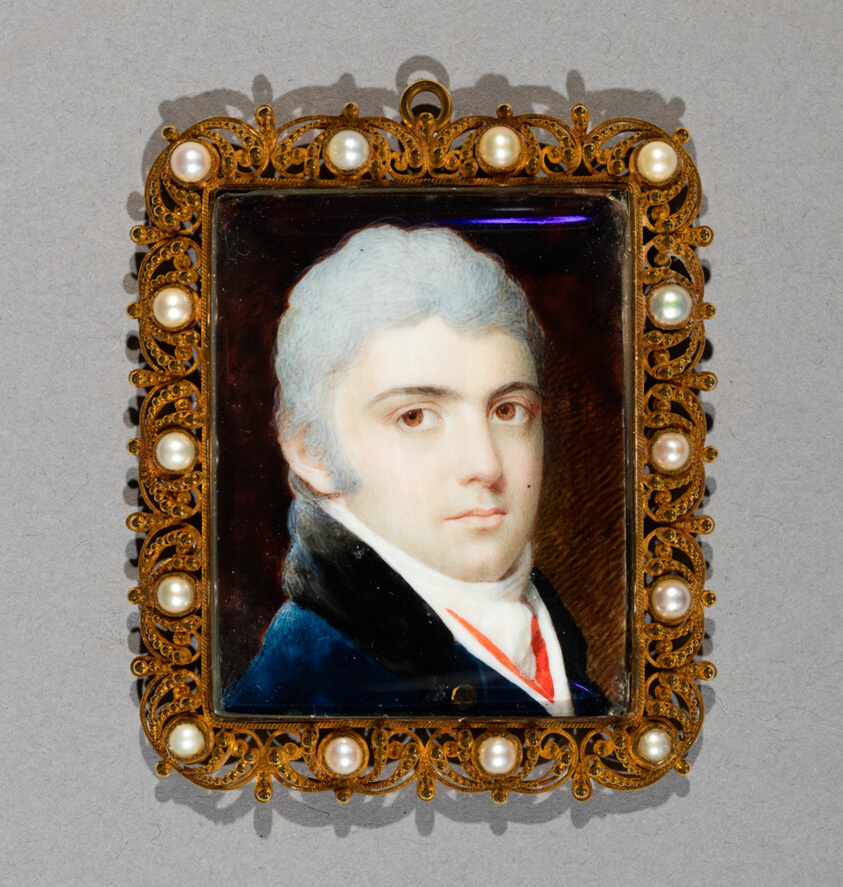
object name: Miniature Painting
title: Man of the Hunter Family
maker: Edward Greene Malbone (American, 1777–1807)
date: 1803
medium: Watercolor on ivory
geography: United States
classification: miniature painting; american arts; miniature; painting